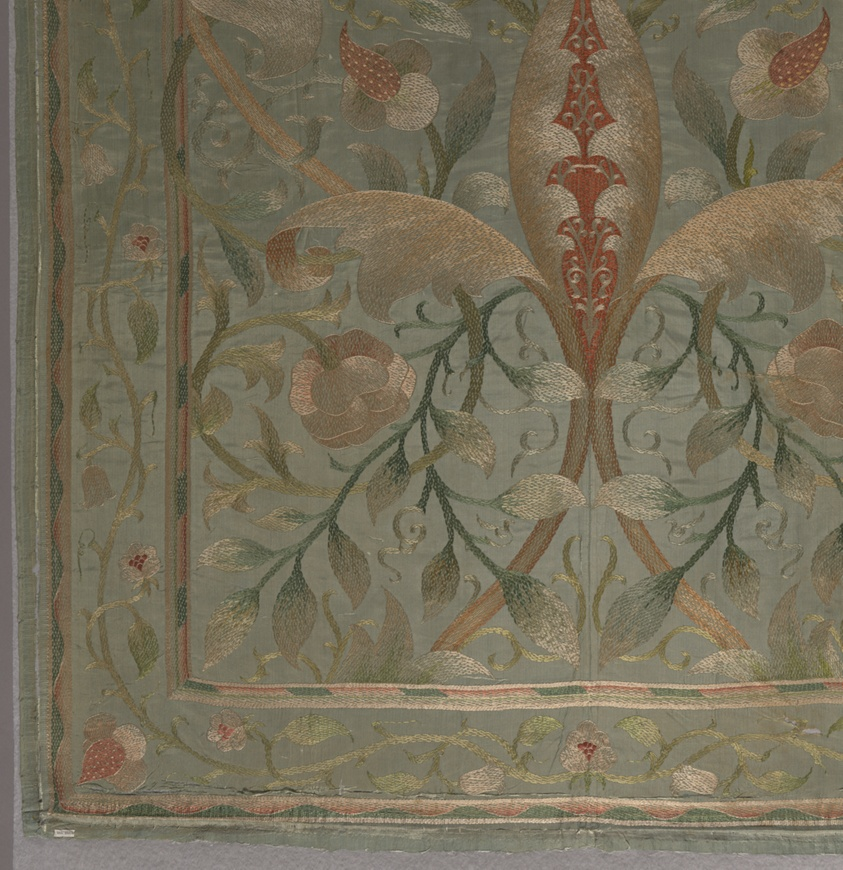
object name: Textile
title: Lotus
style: Arts and Crafts Movement, british, 19th century, British Arts and Crafts Movement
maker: Design attributed to May Morris (English, 1862–1938); Produced by Morris & Co., London (English, 1875–1940); Embroidered by the Decorative Arts Society, Chicago (American, founded 1877)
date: Design by 1888, made 1888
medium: Silk, warp-float faced twill weave; embroidered in satin and stem stitches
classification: textile; needlework (visual works)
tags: floral, lotus